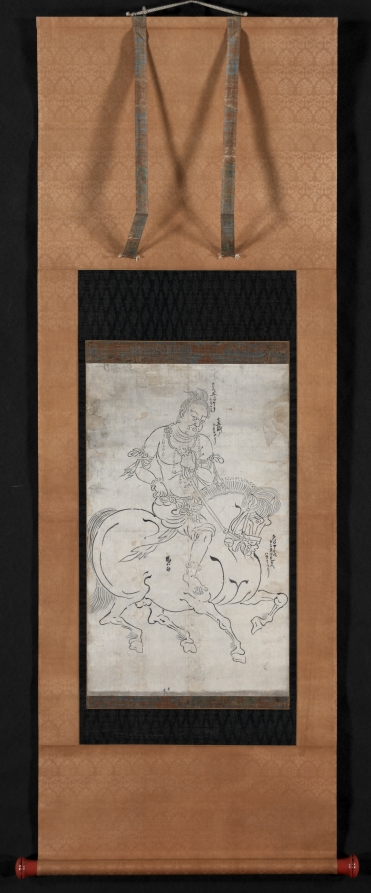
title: The Youth Seitaka (Seitaka Dōji)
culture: Japan, Heian period (794–1185)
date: 1164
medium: hanging scroll; ink on paper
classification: Painting